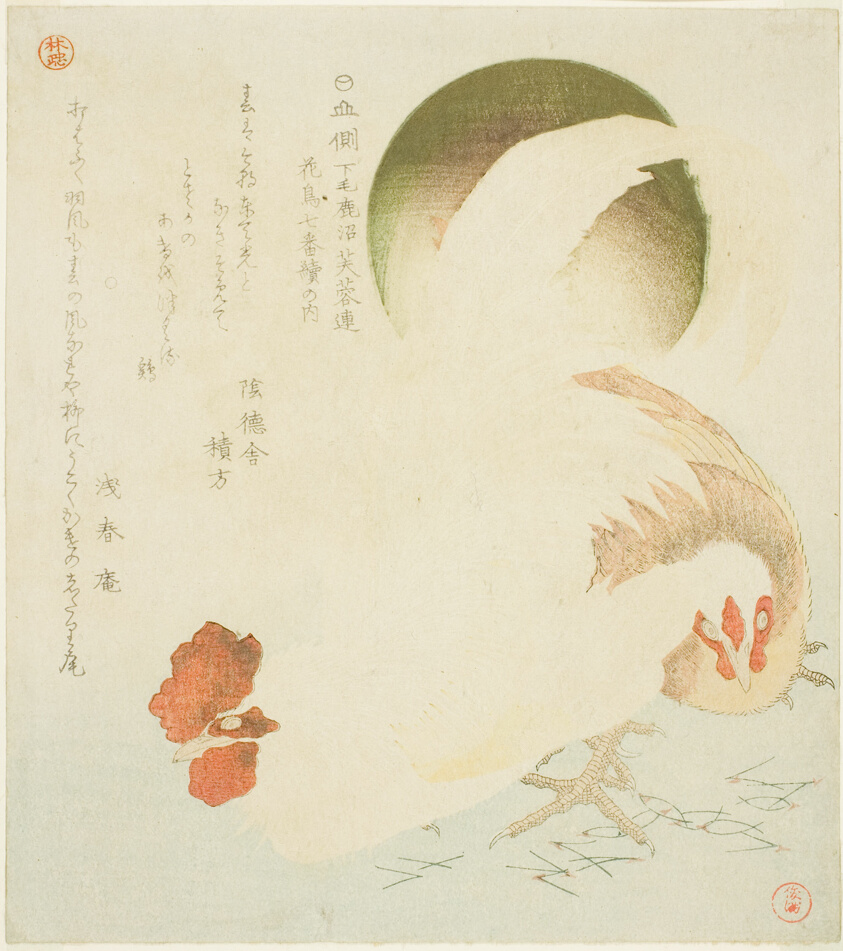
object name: Print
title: Cock, Hen, and Rising Sun, from the series "Seven Bird-and-flower Prints for the Fuyo Circle of Kanuma in Shimotsuke Province (Yamagawa Shimotsuke Kanuma Fuyo-ren kacho nanaban tsuzuki no uchi)"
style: Japanese (culture or style)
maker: Kubo Shunman (Japanese, 1757–1820)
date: c. 1810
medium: Color woodblock print; shikishiban, surimono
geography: Japan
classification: woodblock print; print; asian art